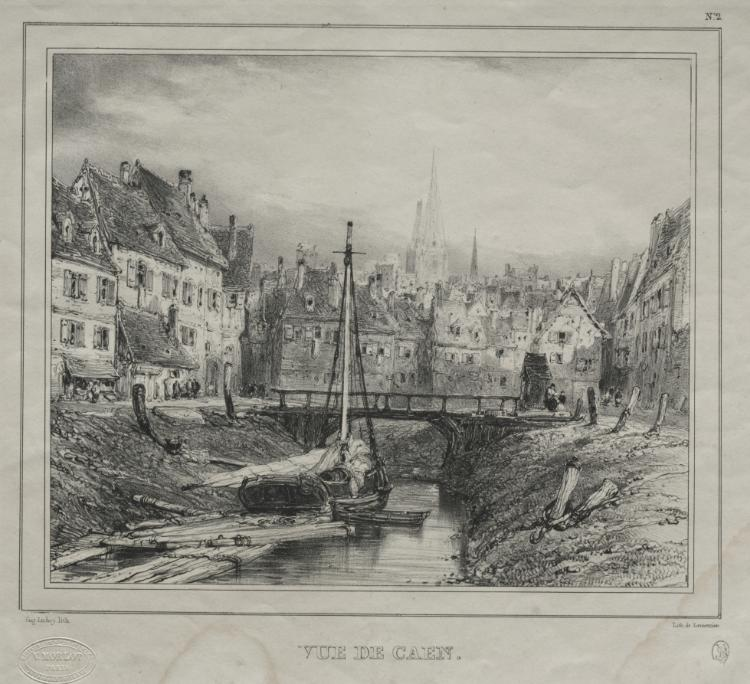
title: Vue de Caen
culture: France, 19th century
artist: Eugène Isabey (French, 1803–1886)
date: 1832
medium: lithograph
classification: Print